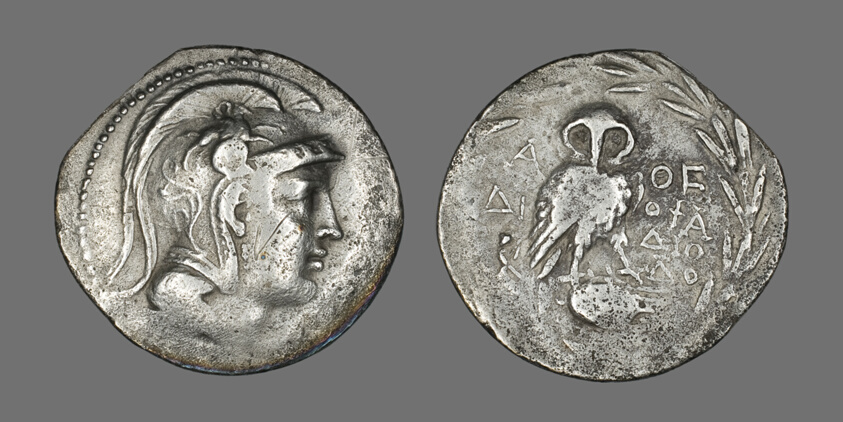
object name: Coin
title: Tetradrachm (Coin) Depicting the Goddess Athena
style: greek, ancient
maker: Greek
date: 196-187 BCE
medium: Silver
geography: Athens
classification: coin; ancient art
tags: goddesses, owl